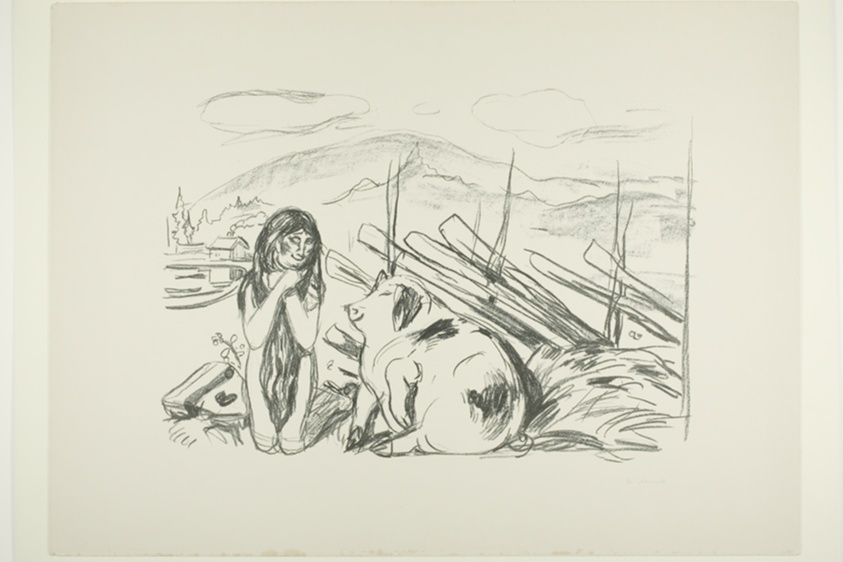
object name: Print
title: Omega and the Pig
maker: Edvard Munch (Norwegian, 1863-1944)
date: 1908/09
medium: Lithograph on paper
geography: Norway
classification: lithograph; print; prints and drawing